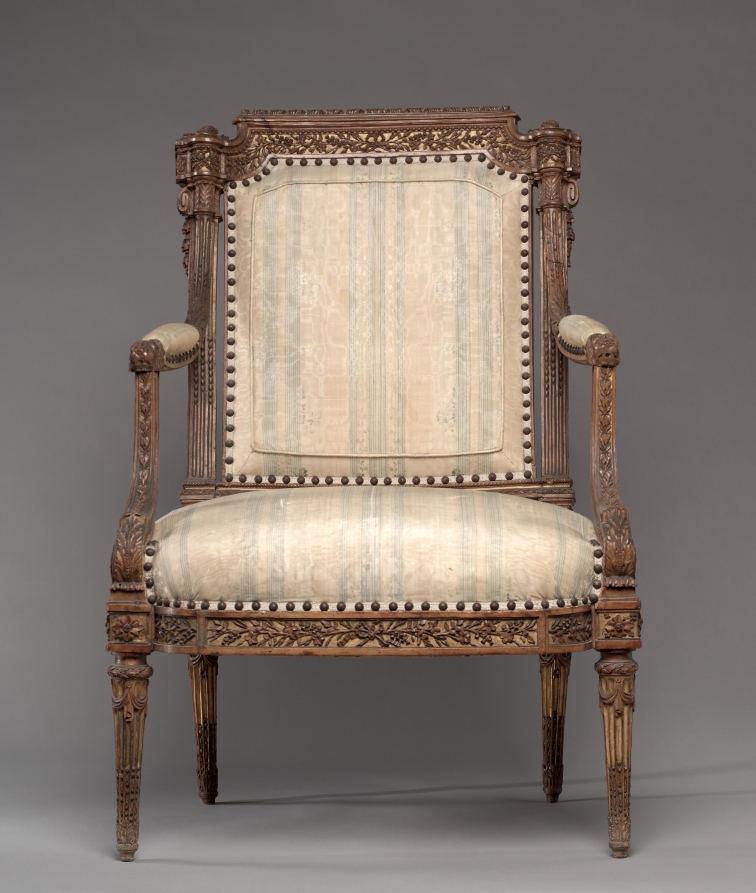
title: Armchair (Fauteuil) (1 of 2)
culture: France, 18th century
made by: Nicolas-Denis Delaisement (French)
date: c. 1785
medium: boxwood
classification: Furniture and woodwork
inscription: signed on back of frame of seat underneath: Delaisement with inverted "s."